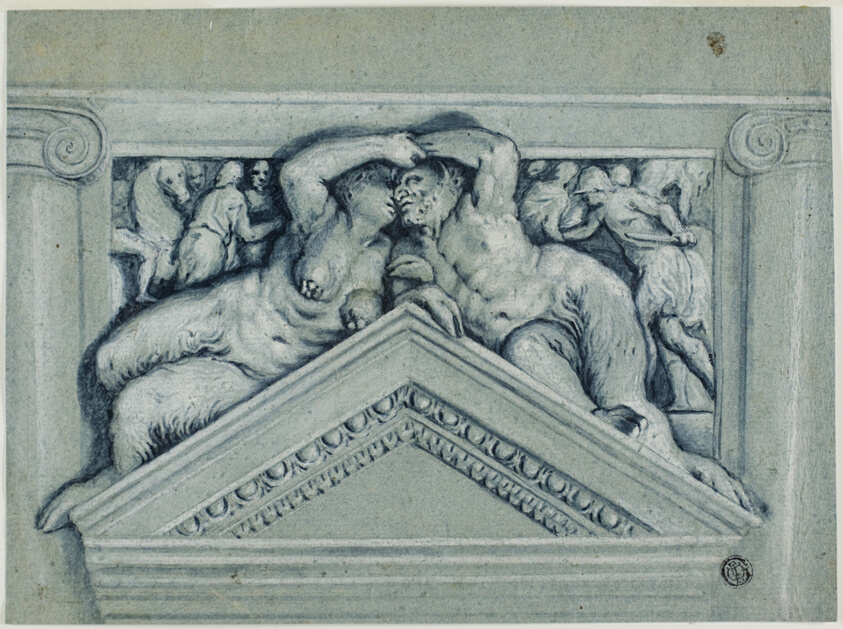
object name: Drawing and Watercolor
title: Overdoor with Satyr and Satyress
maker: After Paolo Caliari, called Veronese; Italian, 1528-1588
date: 17th century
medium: Brush and blue wash, heightened with lead white, over black chalk, on blue laid paper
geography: Italy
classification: wash; drawings (visual works); prints and drawing